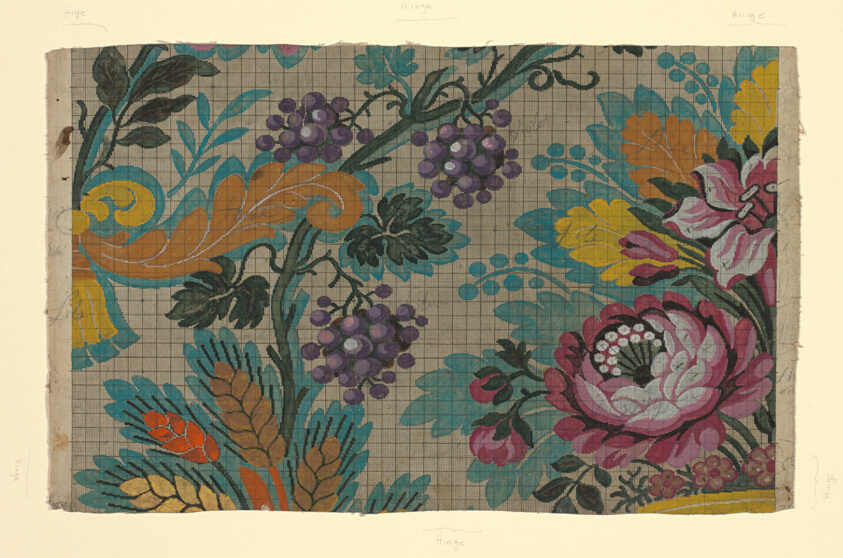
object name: Drawing and Watercolor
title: Mise-en-carte (Point-paper)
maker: France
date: 1760/90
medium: Ink and gouache on hand drawn graph paper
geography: France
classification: textile; accessory - paper design